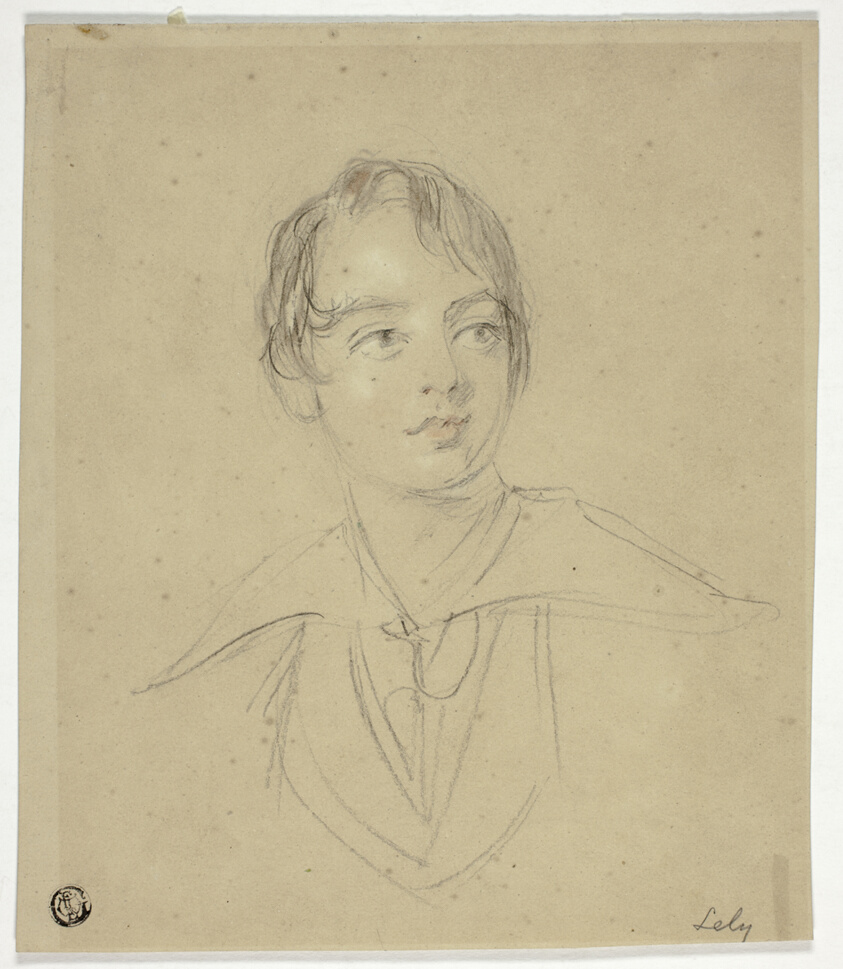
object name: Drawing and Watercolor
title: Portrait Bust of Youth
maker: Follower of George Henry Harlow (English, 1787-1819); or Sir Peter Lely (English, 1618-1680)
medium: Charcoal, with stumping, and touches of red pastel, heightened with traces of white pastel, on tan wove paper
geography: United Kingdom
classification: graphite; drawings (visual works); prints and drawing